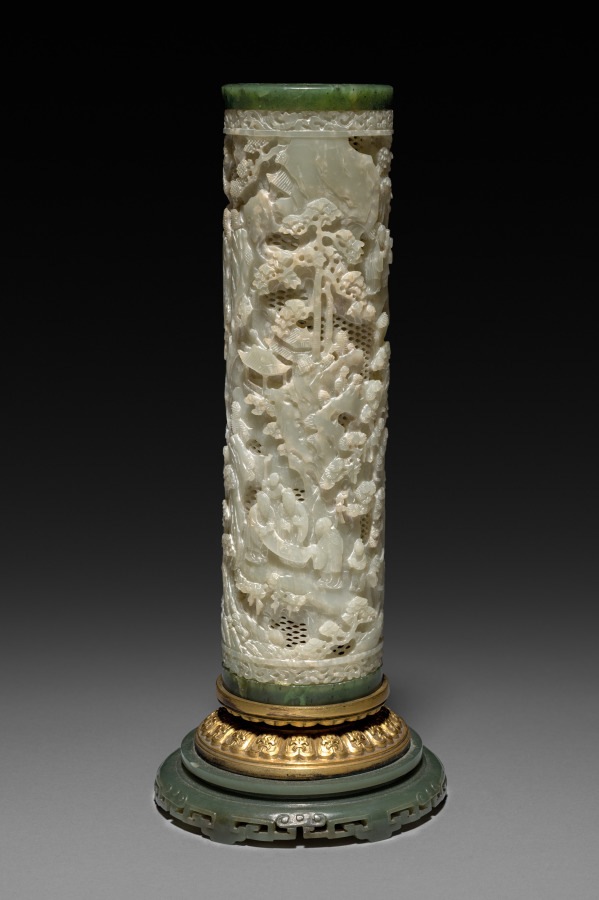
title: Cylinder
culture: China, Qing dynasty (1644-1911) or Republican period (1912-49)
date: 1800–1940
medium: jade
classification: Jade